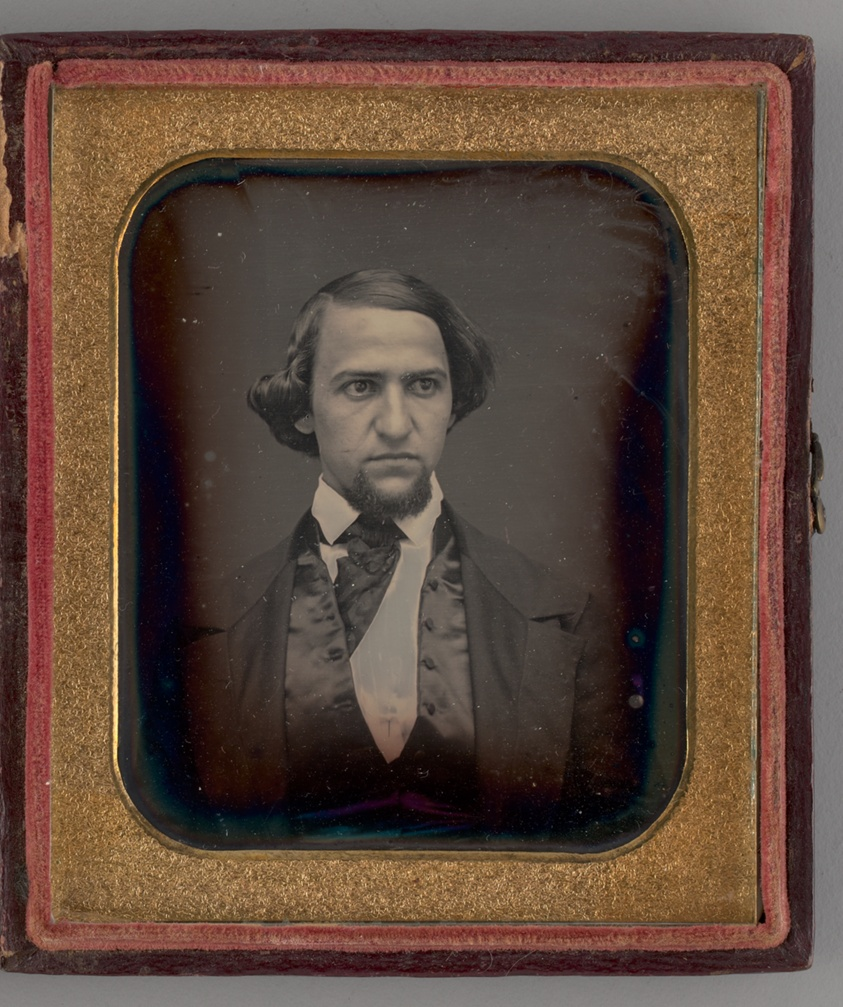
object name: Photograph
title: Untitled (Portrait of a Man)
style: 19th century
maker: Unknown maker; American, 19th century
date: 1848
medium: Daguerreotype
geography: United States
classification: portrait; photograph; photographic process; photography; portrait; daguerreotype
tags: lundberg collection, portraits, portraits: male subject